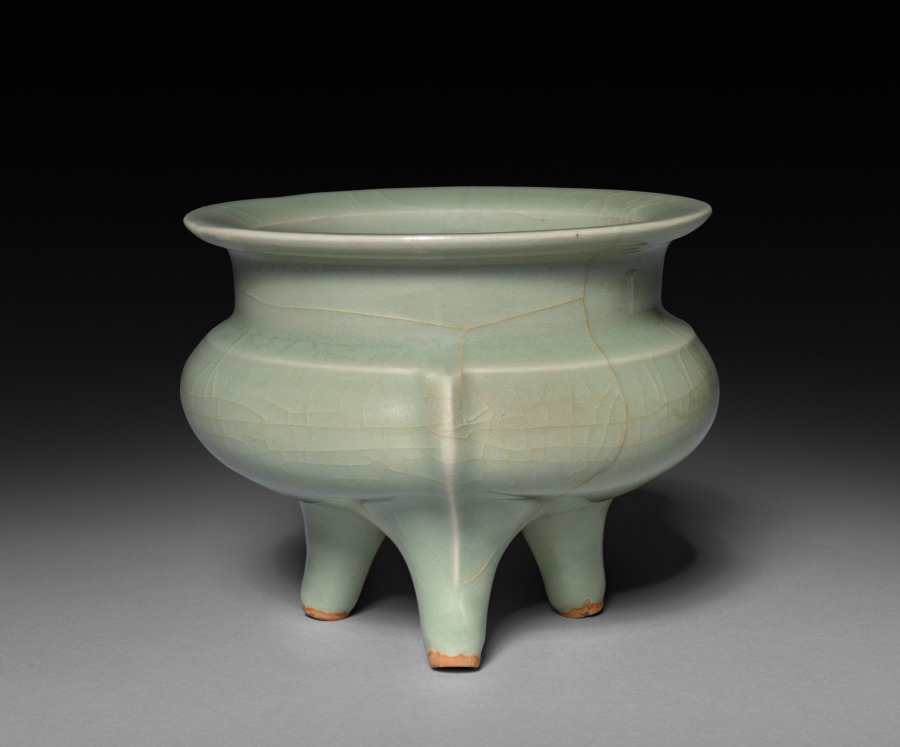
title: Incense Burner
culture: China, Southern Song dynasty (1127-1279)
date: 960–1279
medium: glazed porcelain, Longquan ware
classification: Ceramic